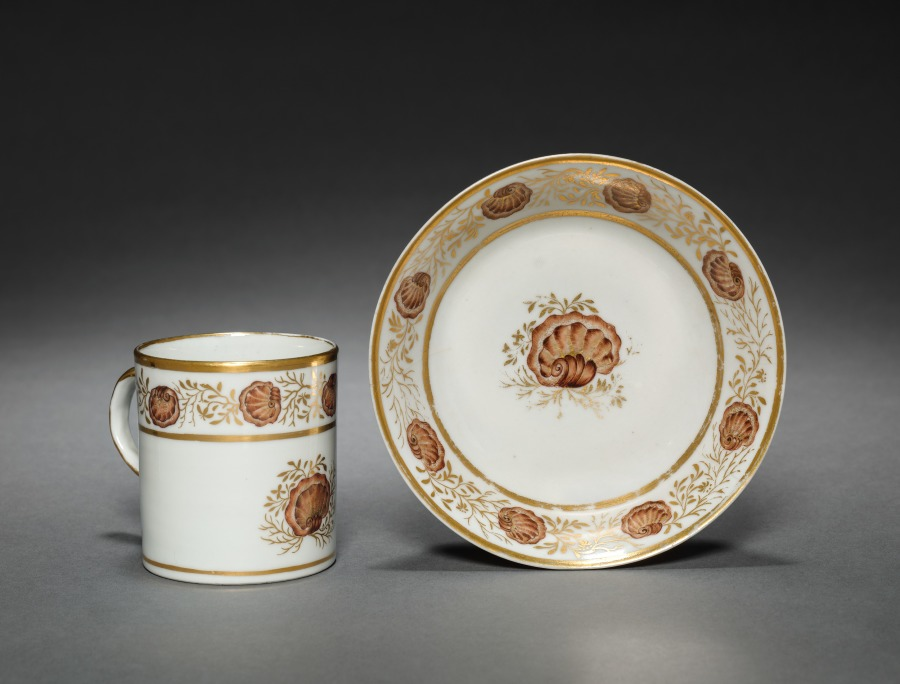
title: Cup from Oliver Wolcott, Jr. Tea Service (3 of 6)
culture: Chinese Export porcelain, late 18th-early 19th century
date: 1785–1805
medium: porcelain, sepia enamel, gold leaf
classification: Ceramic